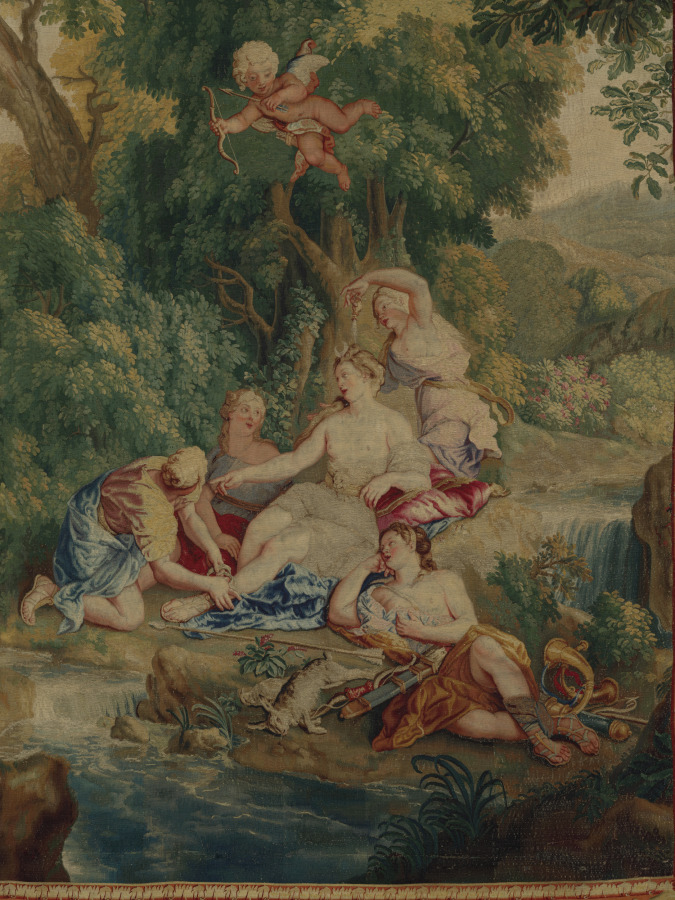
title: Diana's Return from the Chase (from Set of Ovid's Metamorphoses)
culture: France, 18th century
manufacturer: Gobelins Manufactory (France, Paris, est. 1662)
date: 1704–1731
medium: tapestry weave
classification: Tapestry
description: This tapestry’s elaborate border emulates a gilt picture frame, a key characteristic of eighteenth-century Gobelins tapestries. It portrays the goddess Diana at two distinct moments, during and following the hunt, the first accompanied by three dogs, and the second reclining among five attendants. The figures are positioned in a lush landscape near a small stream. A putto, poised to place an arrow in his bow, hovers above Diana. Goddess of the hunt and associated with wild animals and the moon, Diana can be identified by the crescent worn above her forehead. The dead hares indicate a successful hunt.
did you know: During the French Revolution, Gobelins tapestries were sometimes disassembled to harvest the gold threads.